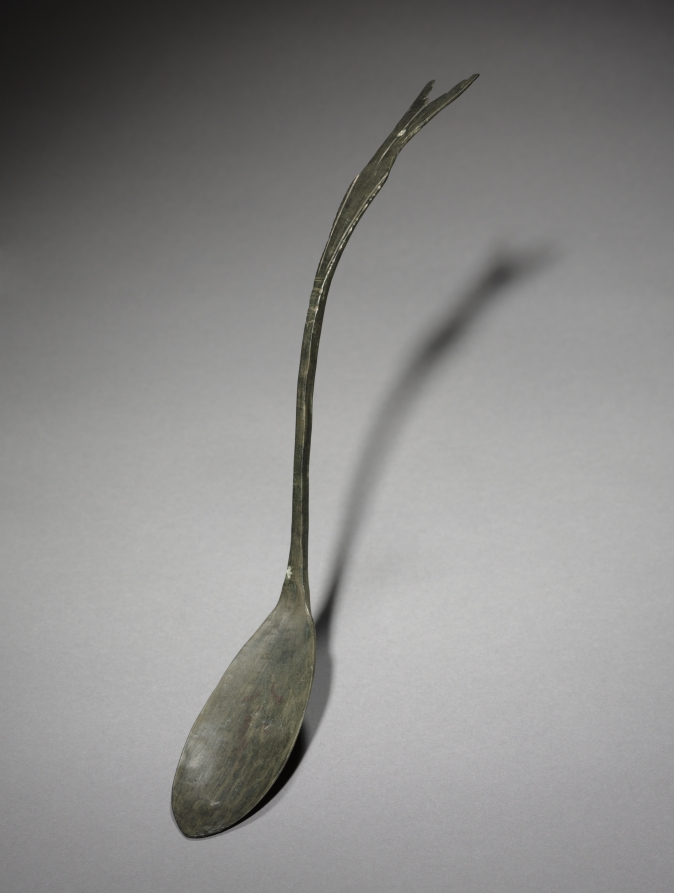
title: Spoon with Fish-Tail Design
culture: Korea, Goryeo dynasty (918–1392)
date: 918–1392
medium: bronze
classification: Metalwork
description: Many of Goryeo period spoons like this one feature a curved handle that splits into a jagged fishtail design. This fishtail design is not unique to Korea; it was also widely used in the area under the rule of two non-Han Chinese states: Liao (907–1125) and Jin (1115–1234). These seemingly ordinary objects testify to exciting material interactions between the Goryeo dynasty and non-Han Chinese northern states, which were often omitted from the official records.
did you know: Bronze spoons are the most common burial item. Scholars have proposed that toward the end of the 1300s, Koreans enjoyed meat-based soups more than any other dishes, explaining why spoons became common household items as well as burial goods.